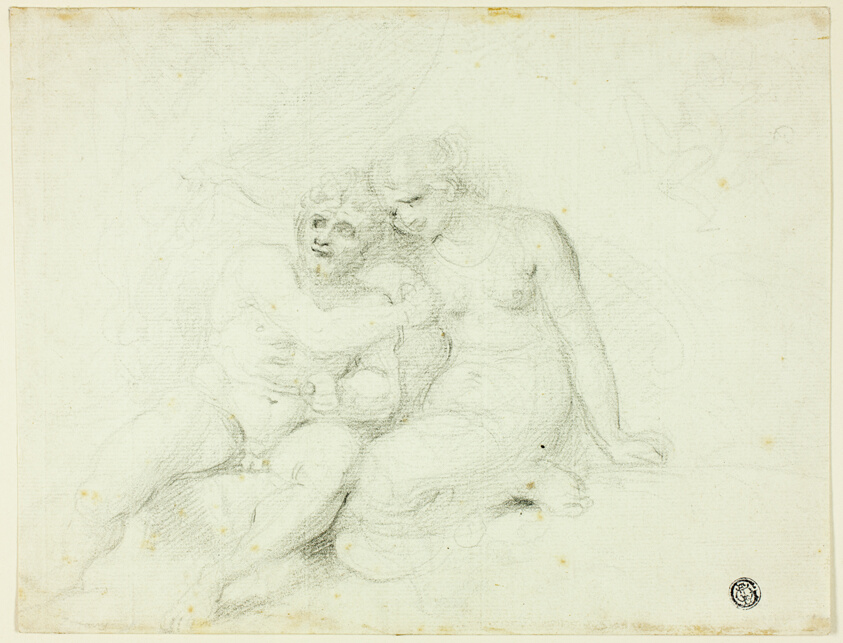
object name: Drawing and Watercolor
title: Seated Male Near Female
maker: Johann Zoffany (English, 1733-1810, born Germany); or Richard Cosway, R.A. (English, 1742-1821)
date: 18th century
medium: Black chalk on ivory laid paper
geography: England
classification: chalk; drawings (visual works); prints and drawing